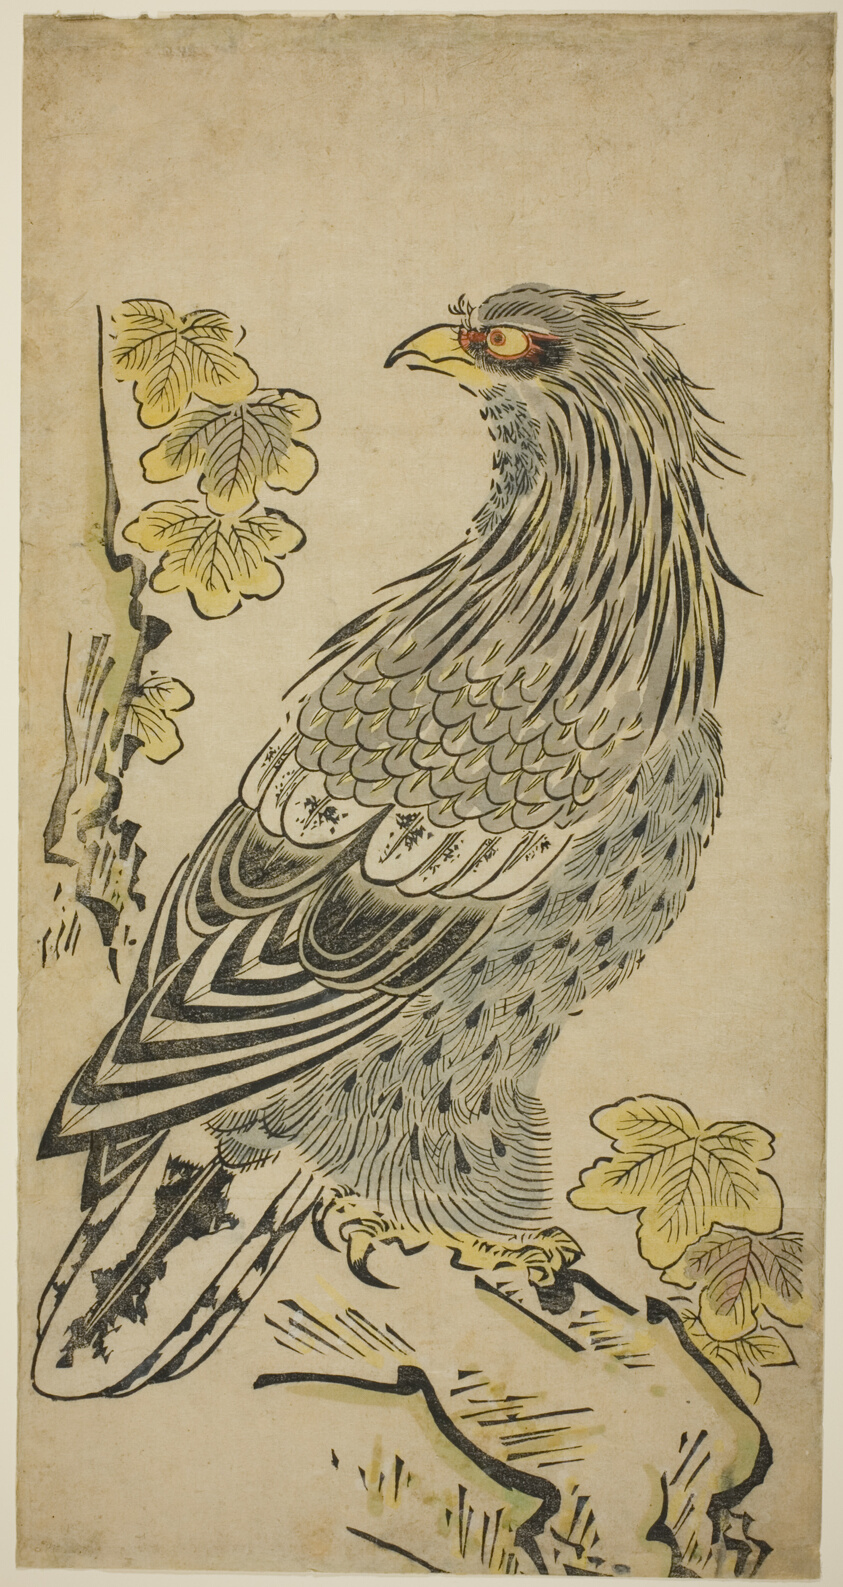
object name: Print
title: A Hawk on a Cliff near a Kiri Tree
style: Japanese (culture or style)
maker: Attributed to Torii Kiyomasu I; Japanese, active c. 1704–18 (?)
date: c. 1716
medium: Hand-colored woodblock print; o-oban, tan-e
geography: Japan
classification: woodblock print; print; asian art